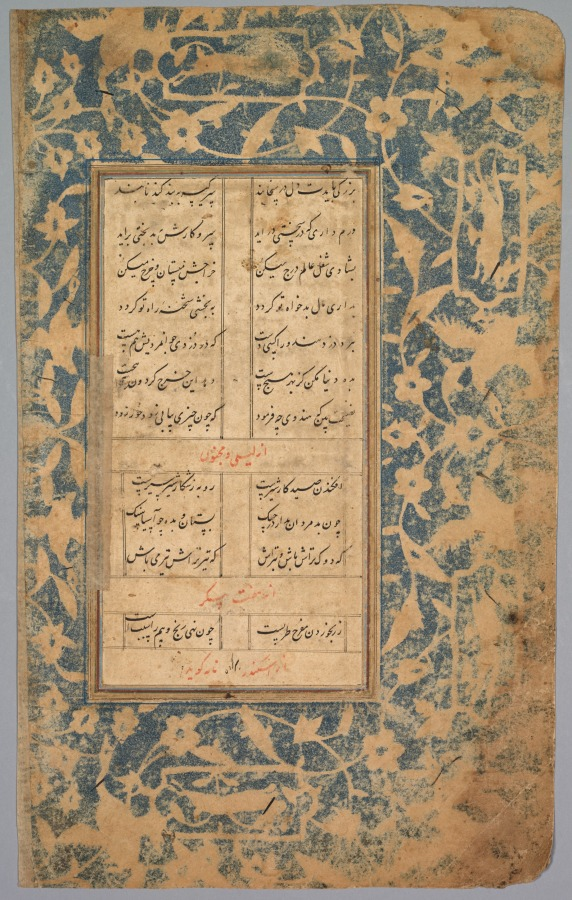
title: School Exercise Alphabet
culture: India, Mughal Dynasty (1526-1756)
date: 18th century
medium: ink on paper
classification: Manuscript